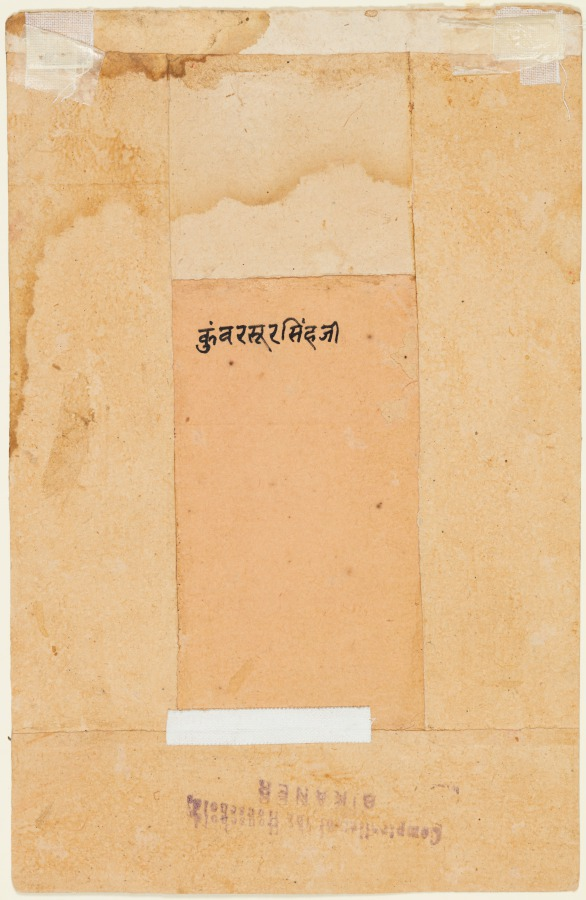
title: Portrait of Prince Sur Singh Rathor of Bikaner (1594–1631)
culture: Northwestern India, Rajasthan, Rajput Kingdom of Bikaner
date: 1611–13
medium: Gum tempera and gold on paper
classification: Painting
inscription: inscribed on the recto nagari number 8. Inscribed on the verso ‘kuṃvara sūra siṃha jī’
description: A young prince stands against a light blue backdrop, dressed in white translucent muslin jama (belted tunic) and yellow trousers. He has a dagger safely tucked in his sash while he holds a long straight sword encased in a black sheath. Religious markings (tilakas) on his forehead, neck, and ear indicate that he was a follower of the Hindu god Vishnu, who was popular among the royal houses of Rajasthan.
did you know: A coin purse hangs by a gold chain from his belt.